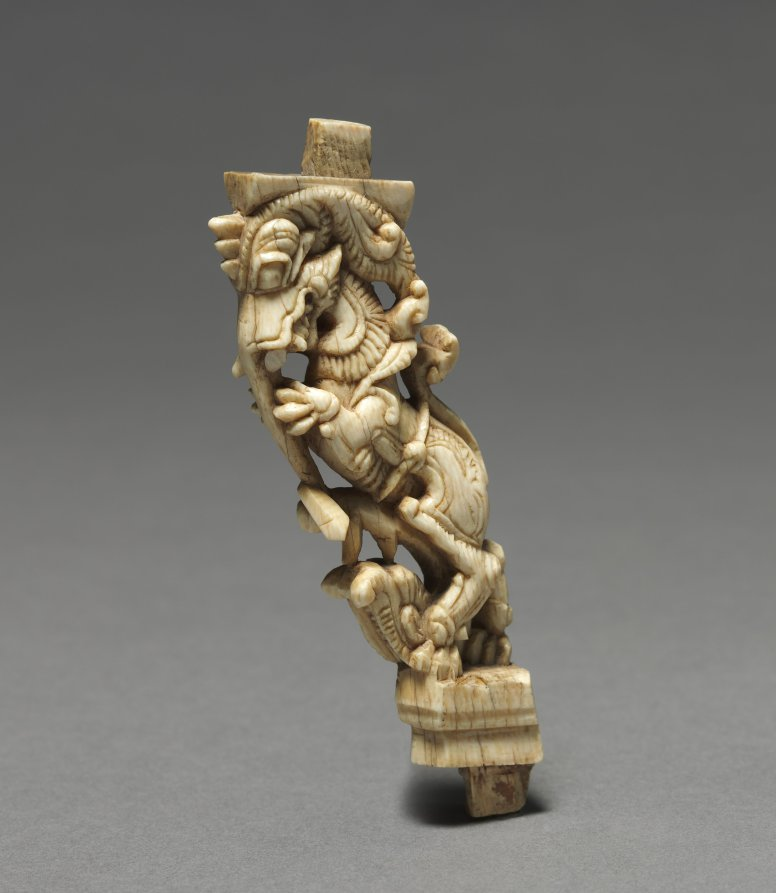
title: Carved Bracket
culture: South India, probably Madurai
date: 1600s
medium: Ivory with traces of pigment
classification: Ivory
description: Composite creatures with the body of a lion, tusks and trunk of an elephant, and horns of an antelope are standard elements of medieval Indian architecture and furniture. Traces of pigment indicate that this work was once brightly colored.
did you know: Ivory was most often harvested from a recently deceased elephant.